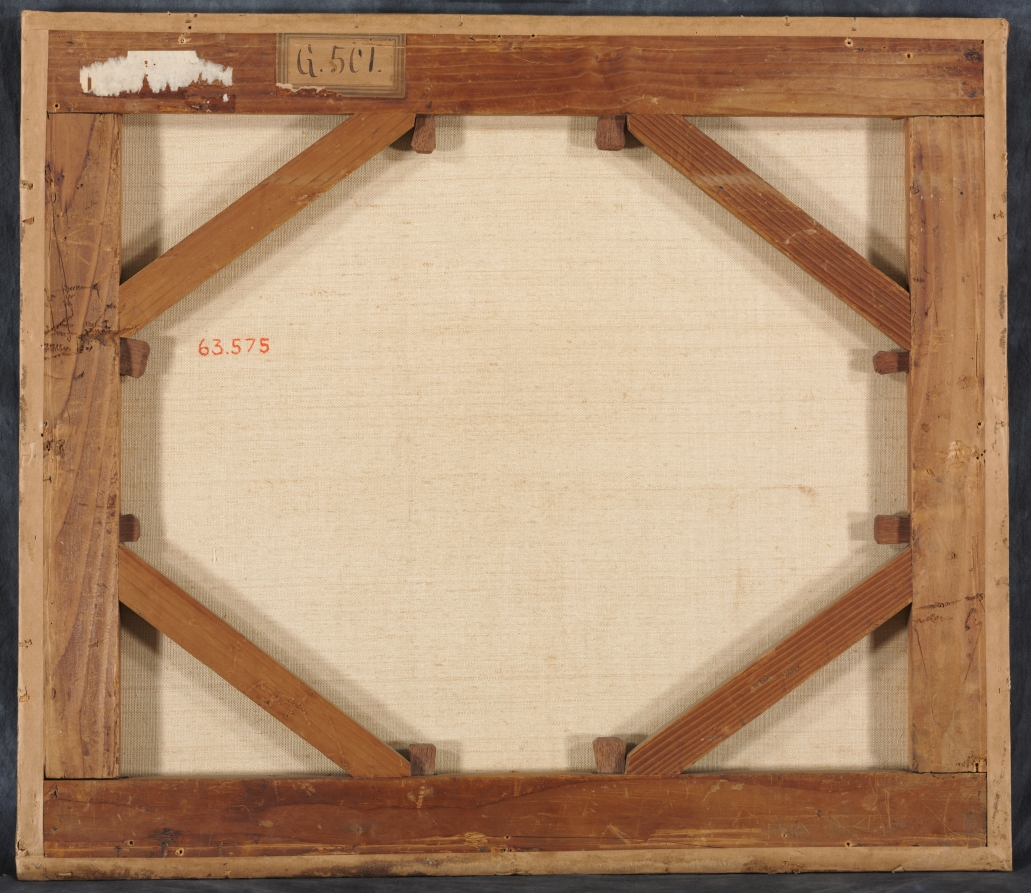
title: Wooded and Hilly Landscape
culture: Netherlands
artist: Jacob van Ruisdael (Dutch, 1628/29–1682)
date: 1660s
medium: oil on canvas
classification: Painting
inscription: Signed lower left: "JvRuisdael [JvR in monogram]"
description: Jacob van Ruisdael, one of the most eminent Dutch landscape painters, is revered for his brooding woodland compositions. With much of this painting's composition dedicated to nature alone, an underlying sense of sublimity is heightened by Ruisdael through the inclusion of several diminutive figures. A mother and child trudge through a weathered path in the foreground, their pet dog following closely at their side, while a lone traveler approaches from the foliage ahead of them. This work is an excellent representation of the artist's later period, speaking to both his preoccupation with meticulous detail and the transitory relationship between humans and nature.